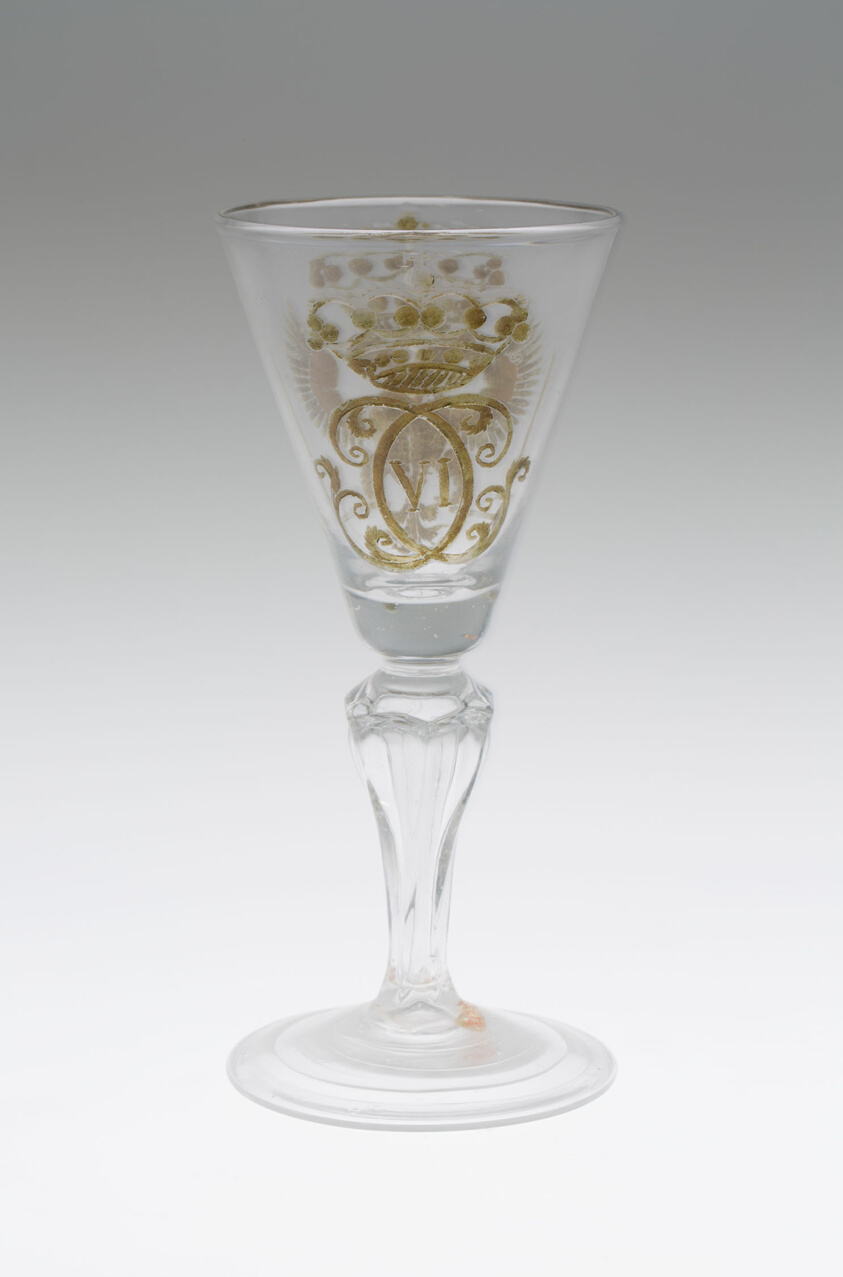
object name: Glass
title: Wine Glass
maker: Germany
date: c. 1730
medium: Glass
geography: Germany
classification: drinking vessel; glass; european decorative arts